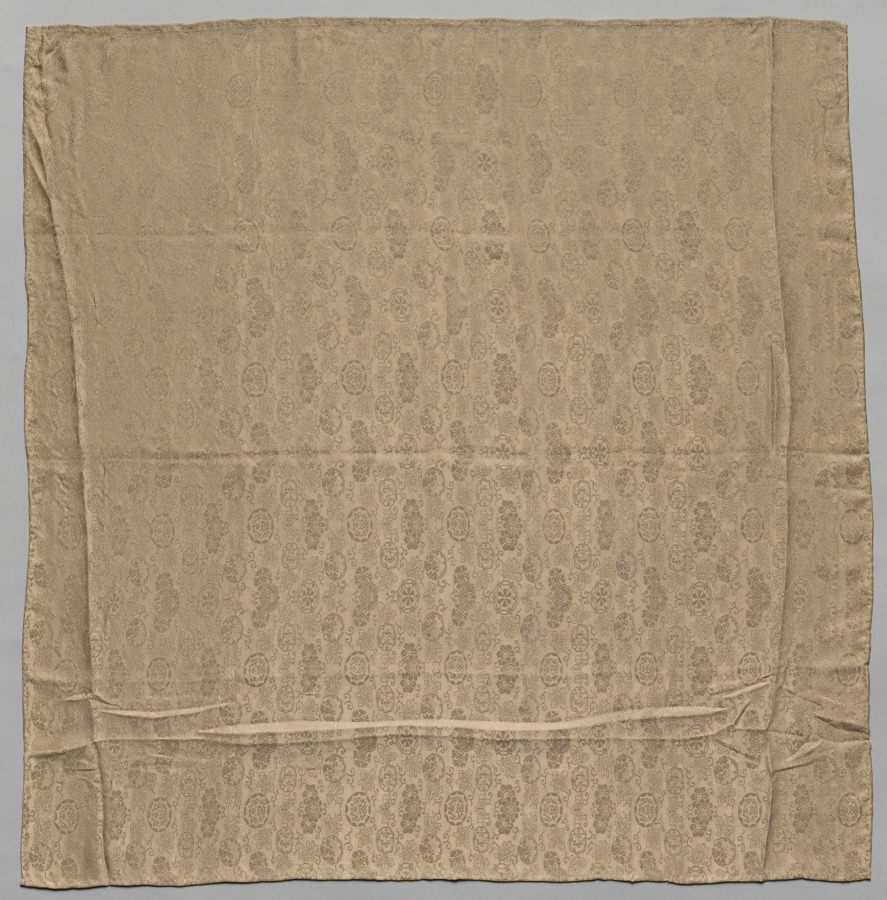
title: Fragment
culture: China, 19th century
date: 1800s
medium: silk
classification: Textile